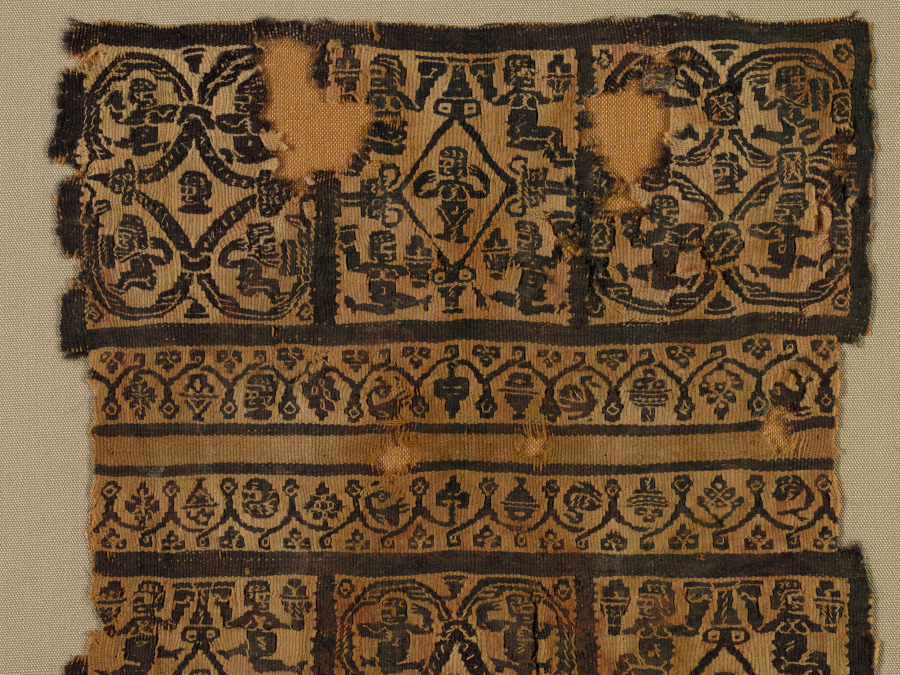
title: Fragment, Sleeve Ornament from a Tunic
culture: Egypt, Byzantine period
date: 500s - early 600s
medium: tapestry (probably originally inwoven in tabby ground); wool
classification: Textile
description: This fragment originally decorated a tunic, the prevalent garment worn by adults and children around the Byzantine Mediterranean. Six square panels feature stylized human figures in various states of movement. With baskets and vessels in hand, they sit, stand, and leap within the scenes. Separating the square panels in the middle, two decorative bands depict alternating stylized figural busts, birds, baskets, and vegetal motifs. Tunic decoration such as this provided wearers a way to express their social status through clothes.